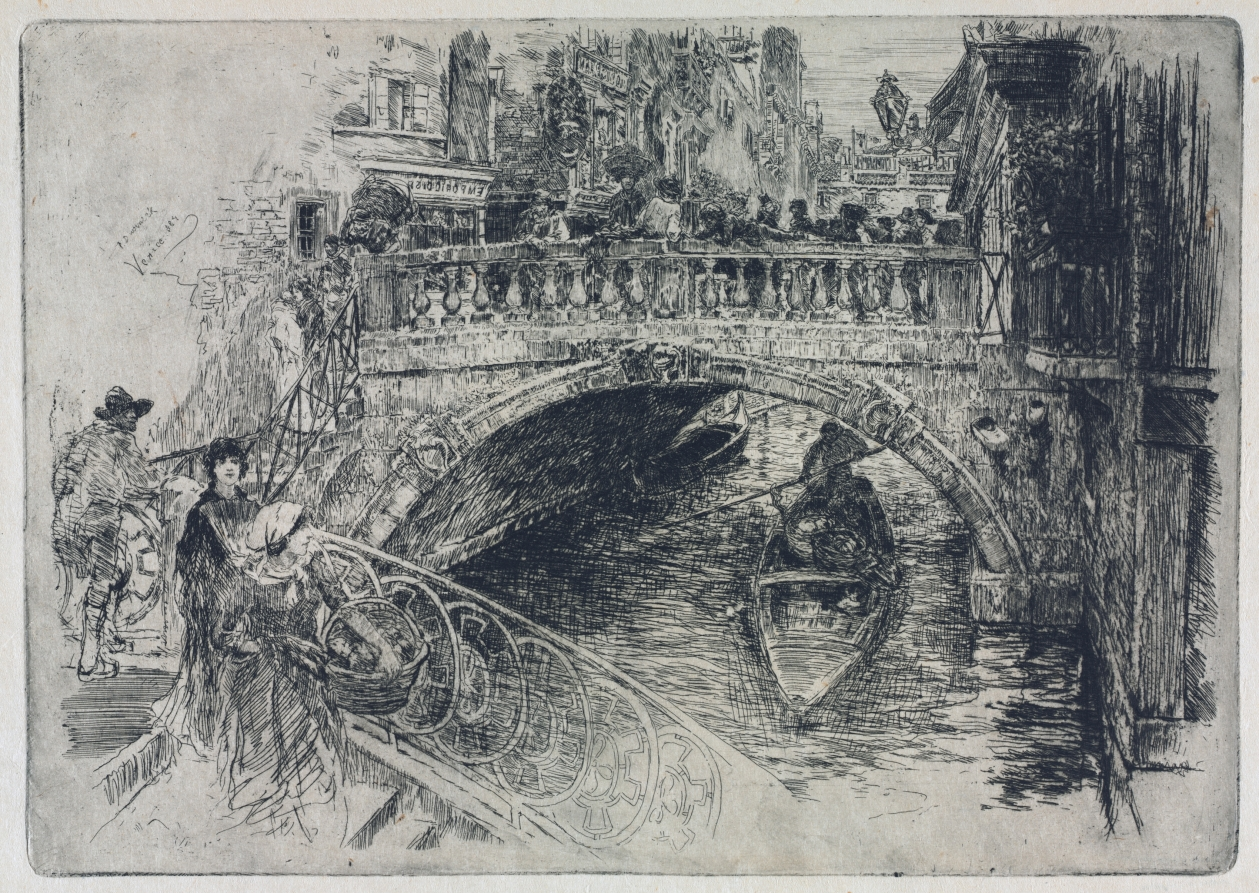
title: Venetian Bridge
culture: America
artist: Frank Duveneck (American, 1848–1919)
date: 1884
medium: etching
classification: Print